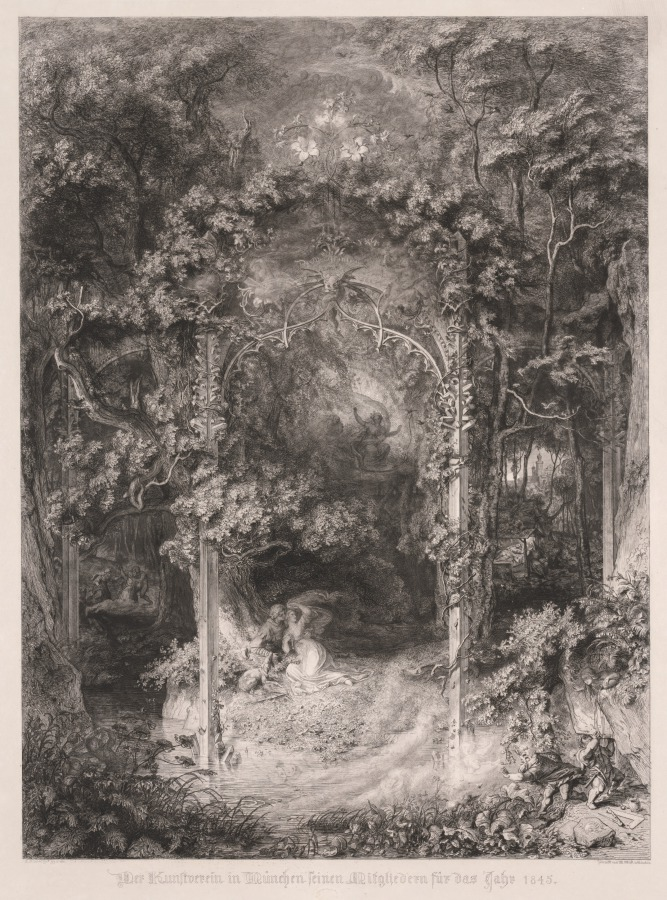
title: The Forest Maiden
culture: Germany, 19th century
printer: Wendelin Wick (German, active 1842–1853)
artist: Eugen Napoleon Neureuther (German, 1806–1862)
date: 1845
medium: etching on steel on wove paper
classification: Print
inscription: In plate: “Der Kunstverein in München seinen Mitglieden für das Jahr 1845”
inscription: below image; “E. Neureuther gez. ü rad”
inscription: below image left; “Gedruckt bei Wick im München”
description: The story of The Forest Maiden tells of female demon who inhabits the forest and appears as a beautiful woman to tempt and prey upon unwitting men. This prints shows several different scenes of seduction, placed through an elaborately woven forest canopy. Eugen Neureuther made this elaborate etching depicting the tale during a revival of interest in folk tales in Germany in the early 19th century.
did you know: Folk tales that featured a young maiden falling in love with a prince were very popular in 19th-century Germany, well before Walt Disney!